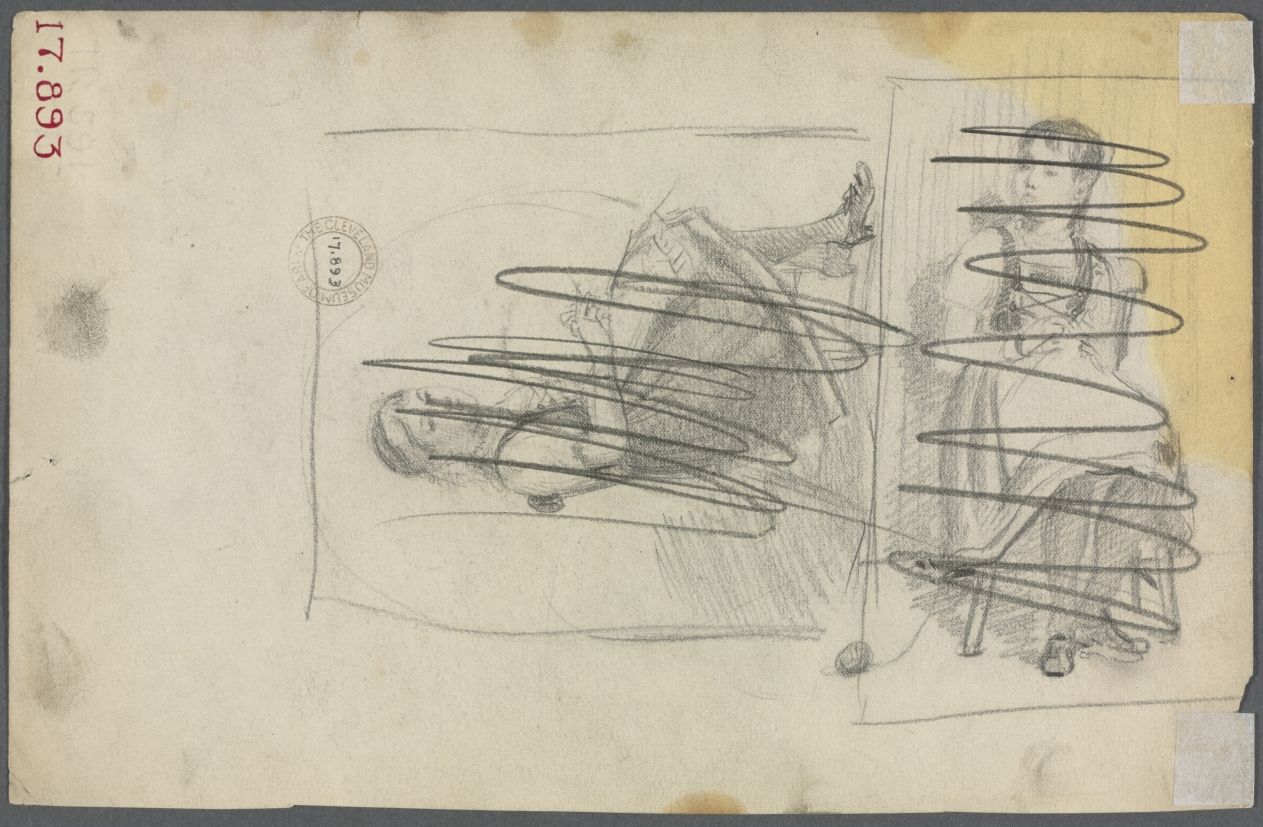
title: Sketch of John Kavanaugh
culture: America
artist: Frank H. Tompkins (American, 1847–1922)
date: 1882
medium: pencil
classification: Drawing